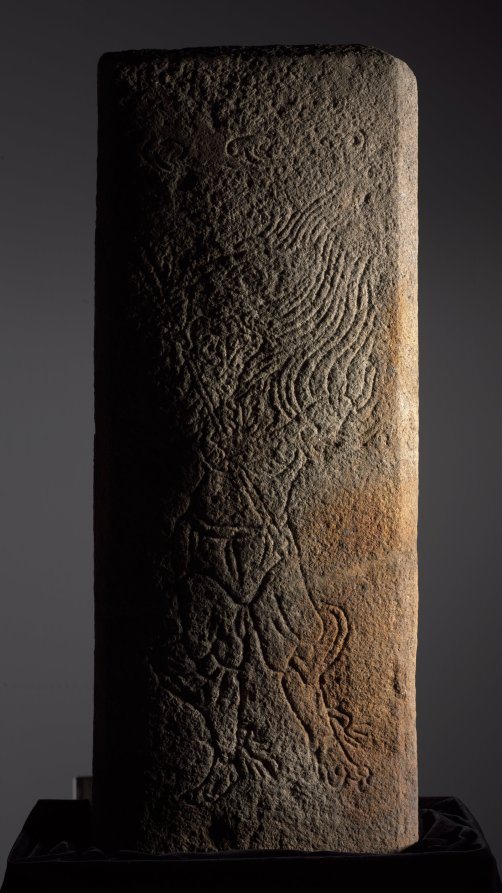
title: Stone Panel for Royal Tomb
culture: Korea, Unified Silla period (676-935)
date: late 700s-early 800s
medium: granite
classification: Sculpture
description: This panel shows a figure with a human body and the features of a rat, which is one of the signs of the Asian zodiac, and is likely one of 12 granite panels from a royal tomb. It is probably from Gyeongju—the capital of the kingdoms of the Silla (57 BCE–668) and Unified Silla (688–935) periods—where large royal tomb mounds can still be found. This panel resembles those showing the animal signs of the Korean zodiac from the tomb of General Kim Yusin (595–673) in Gyeongju, the most famous tomb of the period.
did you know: A rat, one of the signs of the East Asian zodiac, carved in this stone panel symbolizes wealth.